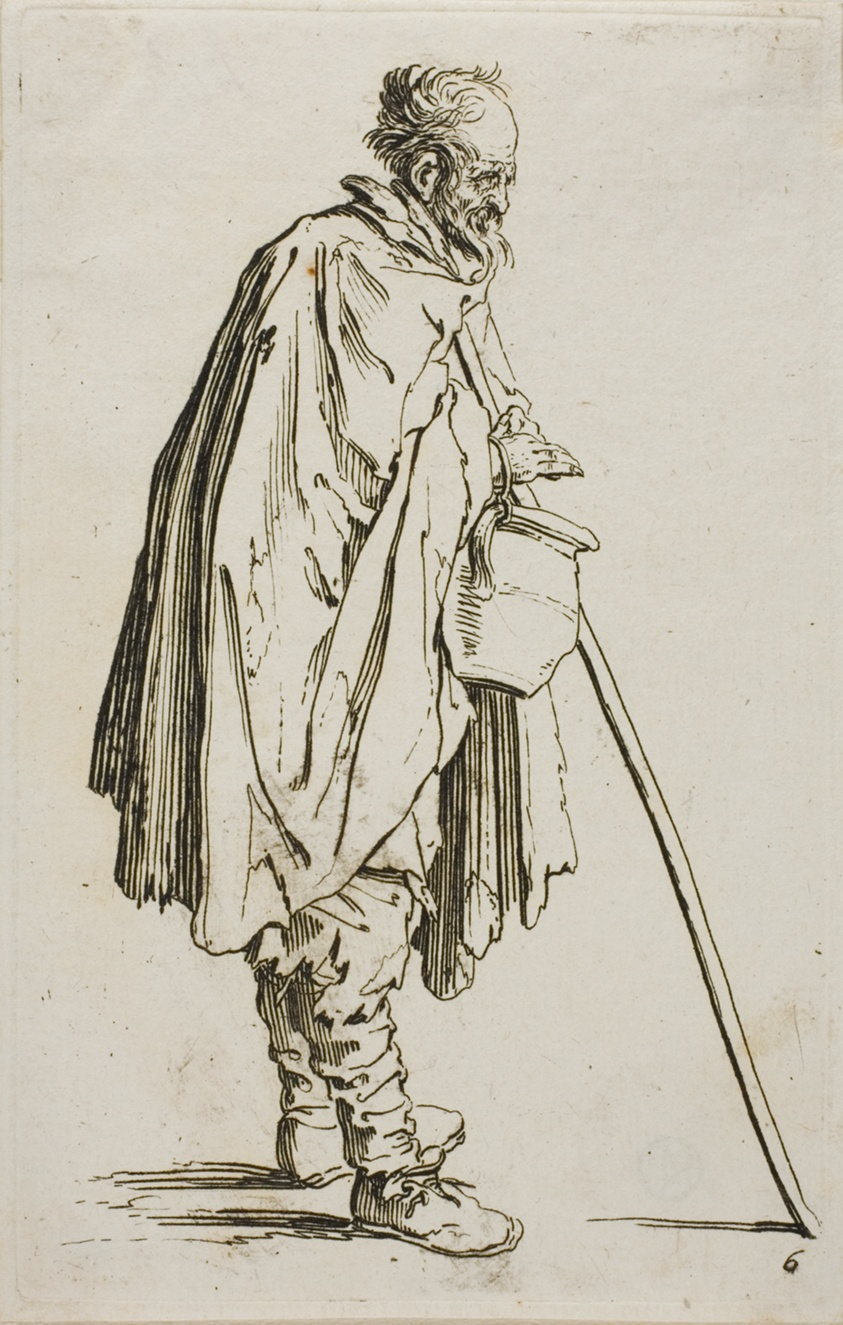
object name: Print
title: The Beggar with a Footwarmer, plate six from The Beggars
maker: Jacques Callot (French, 1592-1635)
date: c. 1622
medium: Etching on paper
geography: France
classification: etching; print; prints and drawing